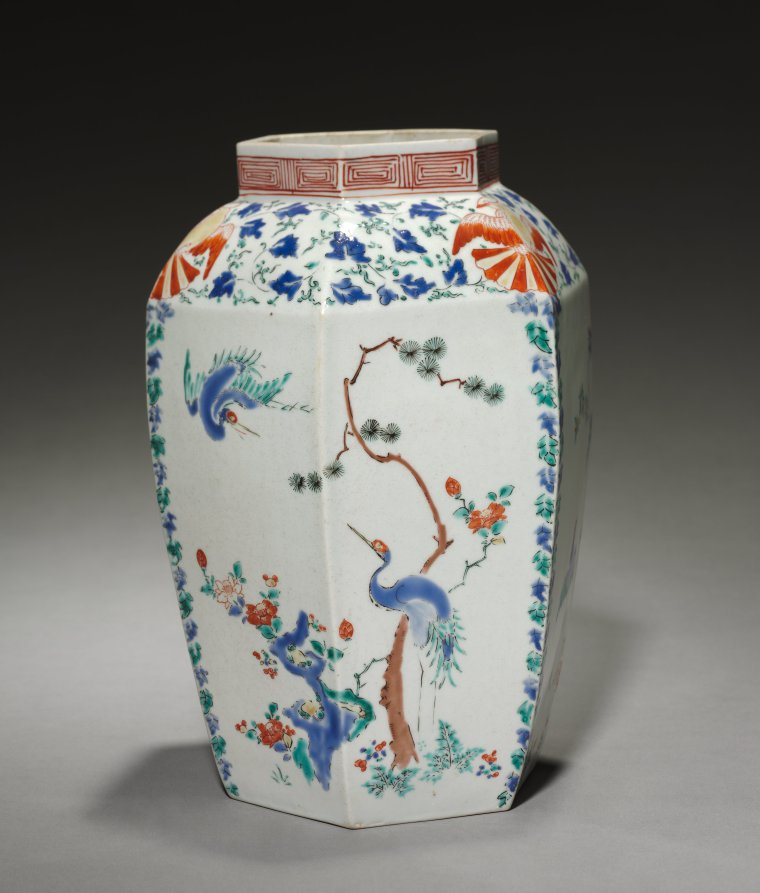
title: Hexagonal Jar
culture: Japan, Edo period (1615–1868)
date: late 1600s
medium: One of a pair; porcelain with overglaze color enamel and gold decoration (Hizen ware, Kakiemon type)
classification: Ceramic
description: This kakiemon-type jar with plum design is a product made for the European markets. Here, Japanese kakiemon potters transformed the typical plum, bamboo, and pine motifs into a theme appreciating the plum. The 9th-century Japanese scholar and politician Sugawara Michizane established the plum as a symbol of scholarship. An excellent poet, particularly of Chinese-style poetry, he was also well known for his love of plum blossoms. Later, the plum came to represent tenmangu, a shrine for Sugawara.